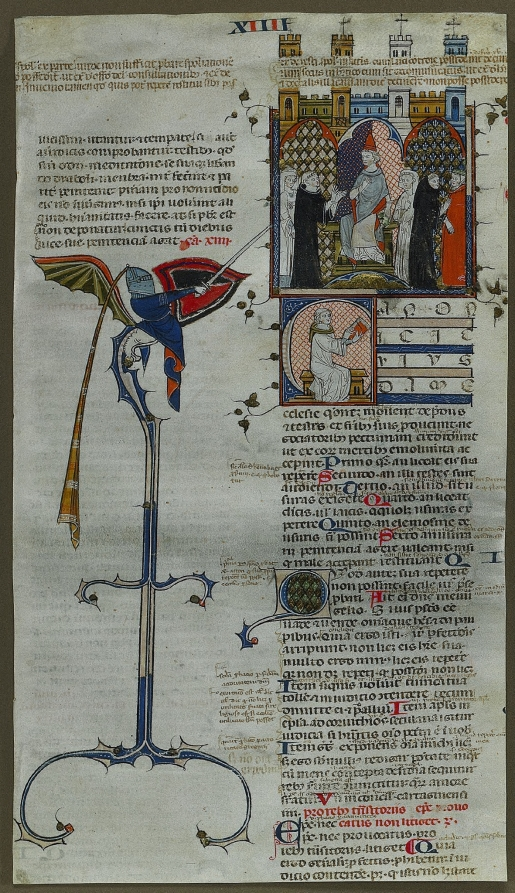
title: Leaf Excised from a "Decretum" by Gratian: Initial C[anonici cuiusdam ecclesiae] with a Seated Cleric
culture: France, Avignon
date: c. 1300–1310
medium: ink, tempera, and gold on vellum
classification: Manuscript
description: Introducing Causa XIV (law case) of the Decretum, this initial C is but one component of a complex decoration scheme. The artist also included a miniature representing an audience scene before a bishop and large drollery (hybrid figure) of a jousting knight beneath the left text column. Both of these devices serve to separate the end of one text and the beginning of another but, in the process, overshadow the initial itself. The script has been identified as by an Italian hand. Because Bologna was the center for the study of canon law at this time, it seems that the codex may have been copied there. The illumination was applied after the undecorated manuscript was carried to France.